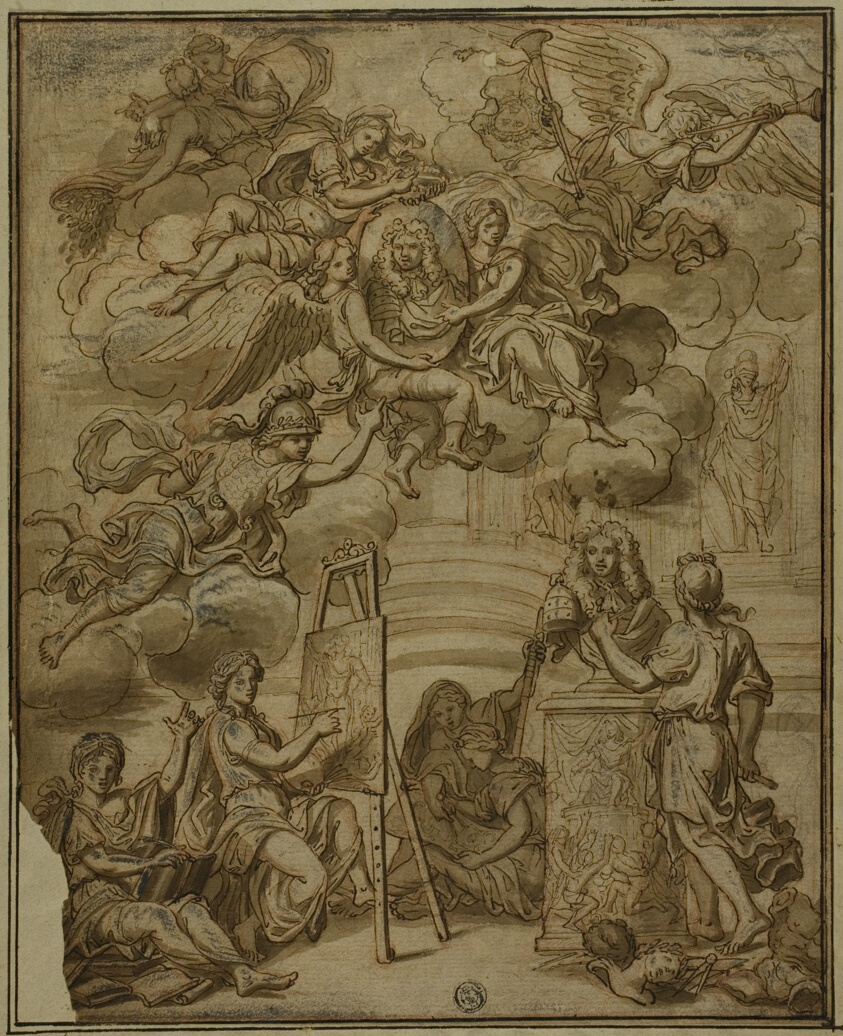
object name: Drawing and Watercolor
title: Title Page with Portrait of Viceroy of Naples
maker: After Francesco Solimena (Italian, 1657-1747); or the School of Pierre Mignard, I (French, 1612-1695)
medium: Pen and brown ink, with brush and brown wash, heightened with lead white (discolored), over red and black chalk, on tan laid paper, laid down on tan wove paper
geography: Italy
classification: pen and ink drawings; drawings (visual works); prints and drawing